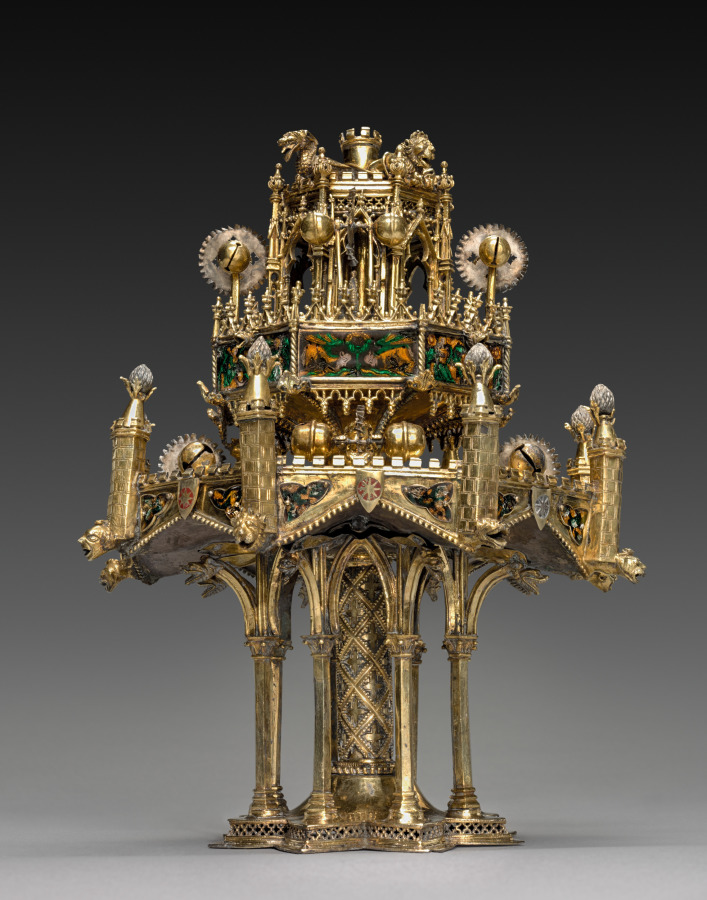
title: Table Fountain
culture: France, Paris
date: c. 1320–40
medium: gilt-silver and translucent enamels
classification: Metalwork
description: Conceptually and stylistically, this object is beyond all else a piece of Gothic architecture in miniature with vaults, pinnacles, columns, and traceried arches. Though the artist who created it is unknown, he was unquestionably inspired by the great Gothic buildings of his time. The table fountain is a three-tiered assembly combining cast elements with bent sheets of gilt-silver. To these have been attached a series of enamel plaques representing grotesque figures, some of which play musical instruments. Water wheels and bells were added to capture motion and sound. The rich detail, precious materials, and involved ornamentation of this deluxe object suggest it would have been expensive to produce and highly treasured by its original owner, someone of high status, and would have been deployed as an object of spectacle. This is the most complete example of its type known to survive from the Middle Ages. Medieval inventories reveal that small fountains like this, often taking various forms, and generally made from precious metals, once existed in large numbers, thus making the Cleveland table fountain an extremely rare object.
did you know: This fountain with its minute architectural details and finely made enamel plaques displayed the wealth and refinement of the owner as it entertained his guests. Imagine hearing the ringing of the tiny bells when this fountain was in use.